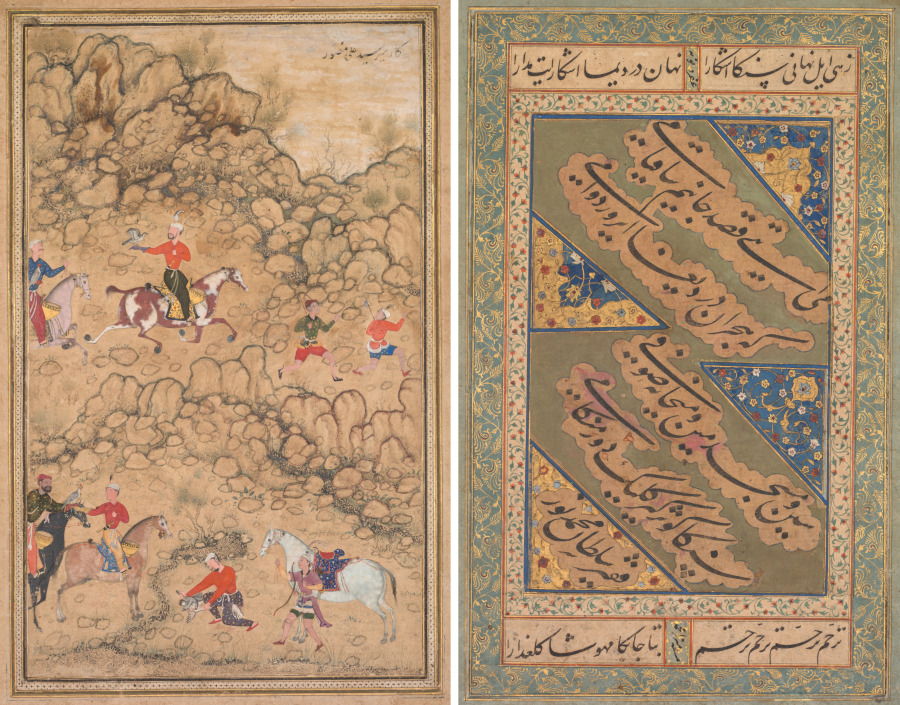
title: Hunting with falcons in a landscape; verso: Calligraphy of Chaghatai Turkish poems in praise of wine, Sultan Muhammad Nur (Persian, c. 1472–1536) and Mirza Muhammad (probably Persian, active c. 1520s)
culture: Mughal India, court of Akbar (reigned 1556–1605)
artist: attributed to Abd al-Samad (Persian, c. 1510–1600)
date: c. 1558–60; borders added probably 1700s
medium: Gum tempera, ink, and gold on paper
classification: Painting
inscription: Recto: Inscription in upper right in nasta‘liq script, probably during the 1700s: the work of Mir Sayyid Ali, the illustrator;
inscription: Verso: Persian inscription in central small rectangular panel below, in nasta‘liq script: Copied by Mirza Muhammad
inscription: Verso: Chaghatai quatrain in center, in nasta‘liq script: The wine has made an attempt on my life,/ Since it is the wine that can wear down the pain of separation./ O Sufi! Let the mosque be for you, and the tavern for me,/ Since you need to arrive at the Spring of Kowsar, while I am in need of wine!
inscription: Verso: Persian signature in lower left triangular panel: The humble Sultan Muhammad Nur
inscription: Verso: Chaghatai verses in margins, in nasta‘liq script: Since many obscurities have become clear to you,/ So make it clear that you can put up with my secret pain./ Compassion is the cure for my wounds/ O beloved! O darling! O beauty!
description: The Mughals hunted on horseback with falcons. The hunting party would ride out into the wild and flush the prey. Then, its hood removed, the falcon would chase the prey and bring it down. From childhood Akbar loved hunting, and this painting may be a rare depiction of Akbar as a youth at the lower left, with the black feather in his white turban. The falcon that has caught a duck has been hooded and is being passed between the young man and his bearded companion. This important work was painted by one of the Persian artists Akbar’s father brought to India from Iran. The inscription at the upper right gives the name of one of the other Persian artists, but it is probably an erroneous later addition. This page of delicately illuminated calligraphy from the pre-Mughal period was mounted into a Mughal album. The poems are written in the native language of the Mughals, a form of Turkish called Chaghatai, using a flowing form of Arabic script called nasta‘liq. The Mughals self-consciously adopted Persian as their official court language, so few Chaghatai books or works of calligraphy were made for them. The quatrain in the center reads: The wine has made an attempt on my life, Since it is the wine that can wear down the pain of separation. O Sufi! Let the mosque be for you, and the tavern for me, Since you need to arrive at the Spring of Kowsar, while I am in need of wine! The Spring of Kowsar is where the righteous quench their thirst in the afterlife.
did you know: The hunter’s glove is on the ground, as he pulls his falcon off the duck.